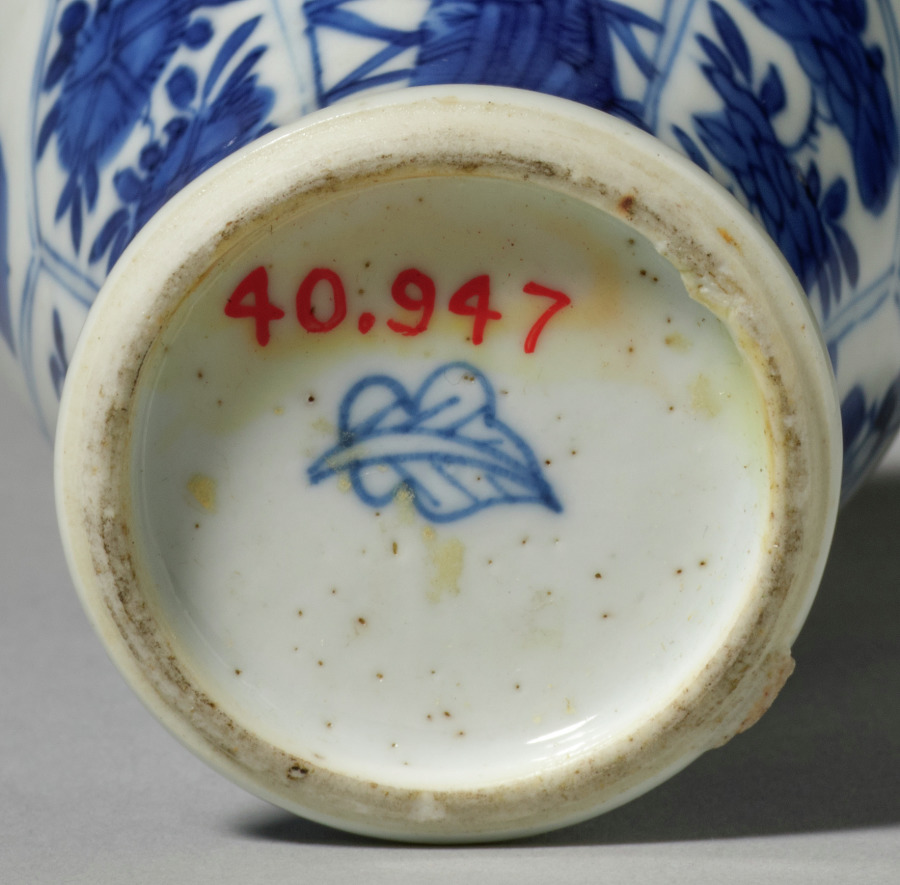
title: Jar with Cover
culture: China, Qing dynasty (1644-1911)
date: 19th Century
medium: porcelain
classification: Ceramic